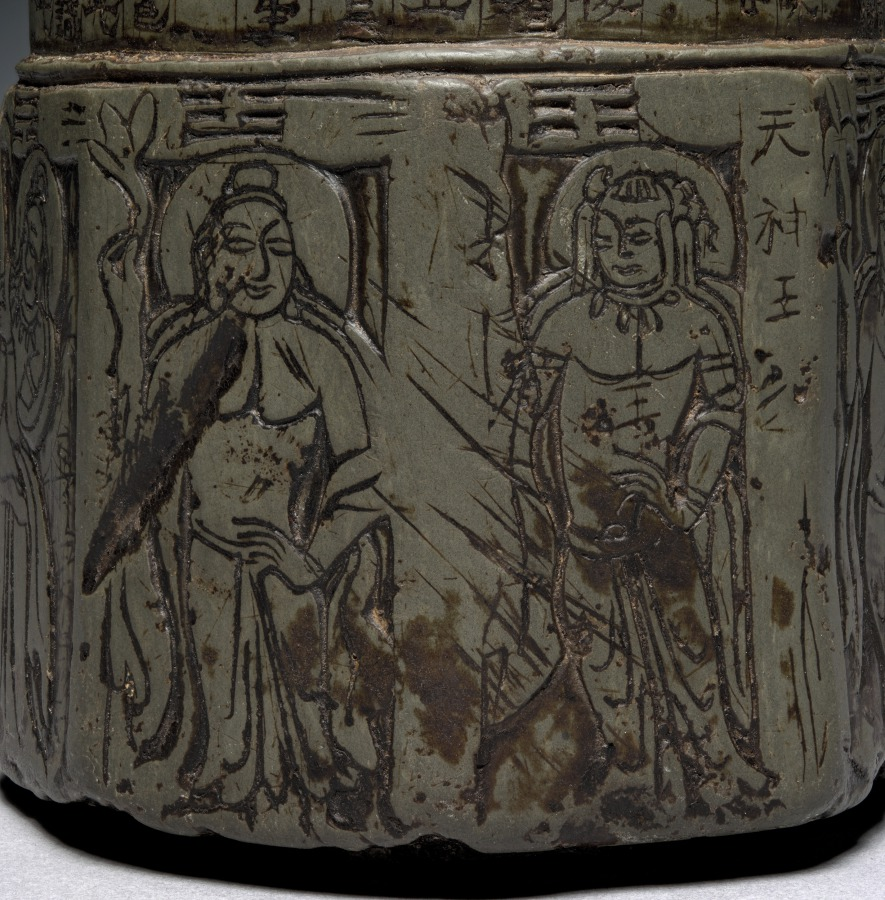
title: Miniature Votive Stupa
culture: China, Gansu province, Northern Wei dynasty (386-534)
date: 435 CE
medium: steatite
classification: Sculpture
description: This sutra pillar, inscribed with a sacred Buddhist text, belongs to a group of miniature stupas (jingta) that were found exclusively in the Gansu corridor, Northwest China. Ranging in date between AD 426–36, some of them bear the names of the lay Buddhist donors who commissioned them. A stupa is an architectural round structure built for the veneration of Buddhist relics. Miniature stupas may have commemorated the visit of a sacred site or represented donations to religious communities and sites.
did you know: There are trigrams, three horizontal lines, broken or continuous, above each of the eight bodhisattvas in the stupa's lower section.